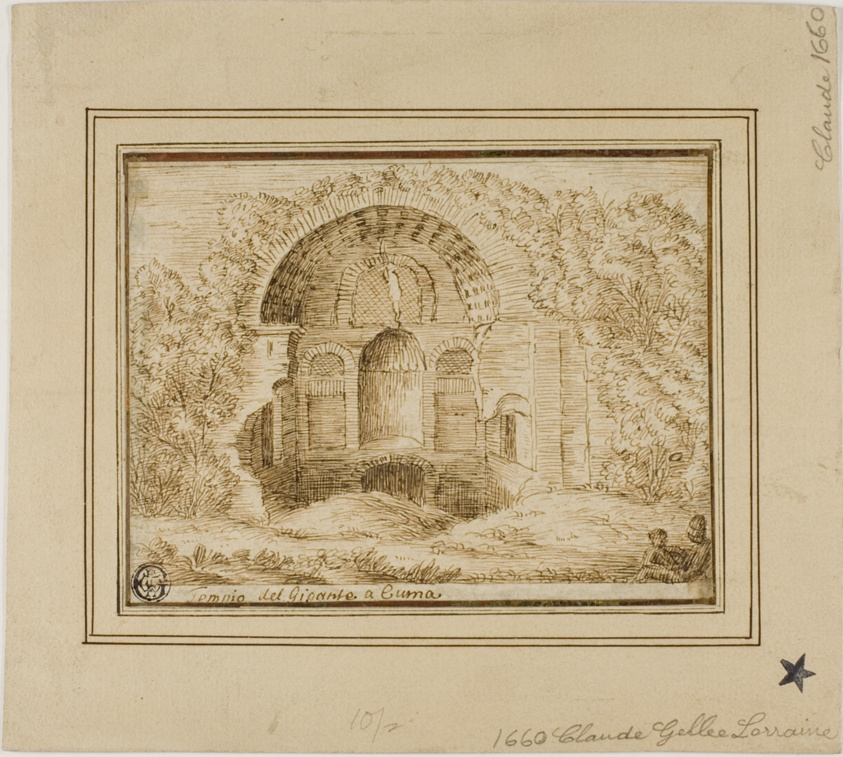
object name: Drawing and Watercolor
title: Giant's Temple at Cumae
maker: Unknown Artist; Italian, 1601-1700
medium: Pen and brown ink on cream laid paper, laid down on cream laid card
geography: Italy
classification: pen and ink drawings; drawings (visual works); prints and drawing